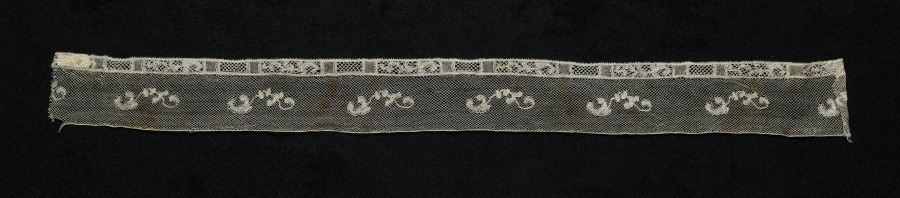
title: Lace Edging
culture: Belgium, Mechelen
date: 1700s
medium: Silk: bobbin lace (Mechelen lace)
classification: Lace